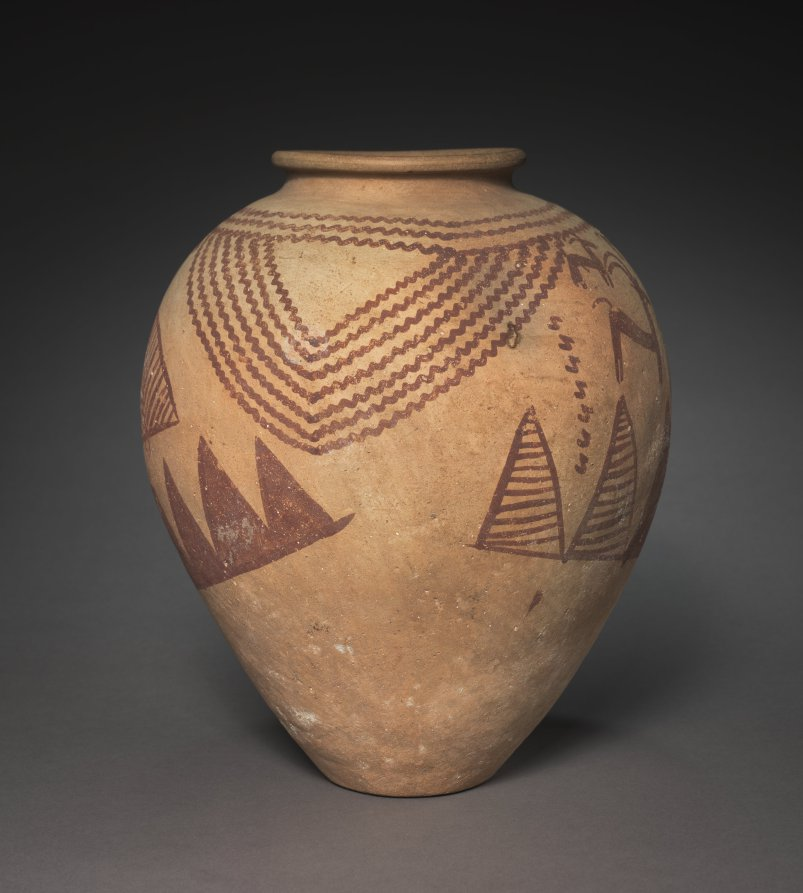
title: Storage Jar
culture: Egypt, Predynastic (5000–2950 BCE), Naqada III (3200–3000 BCE) jar, with modern painted decoration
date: 3100–2950 BCE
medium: marl clay ware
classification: Vessels